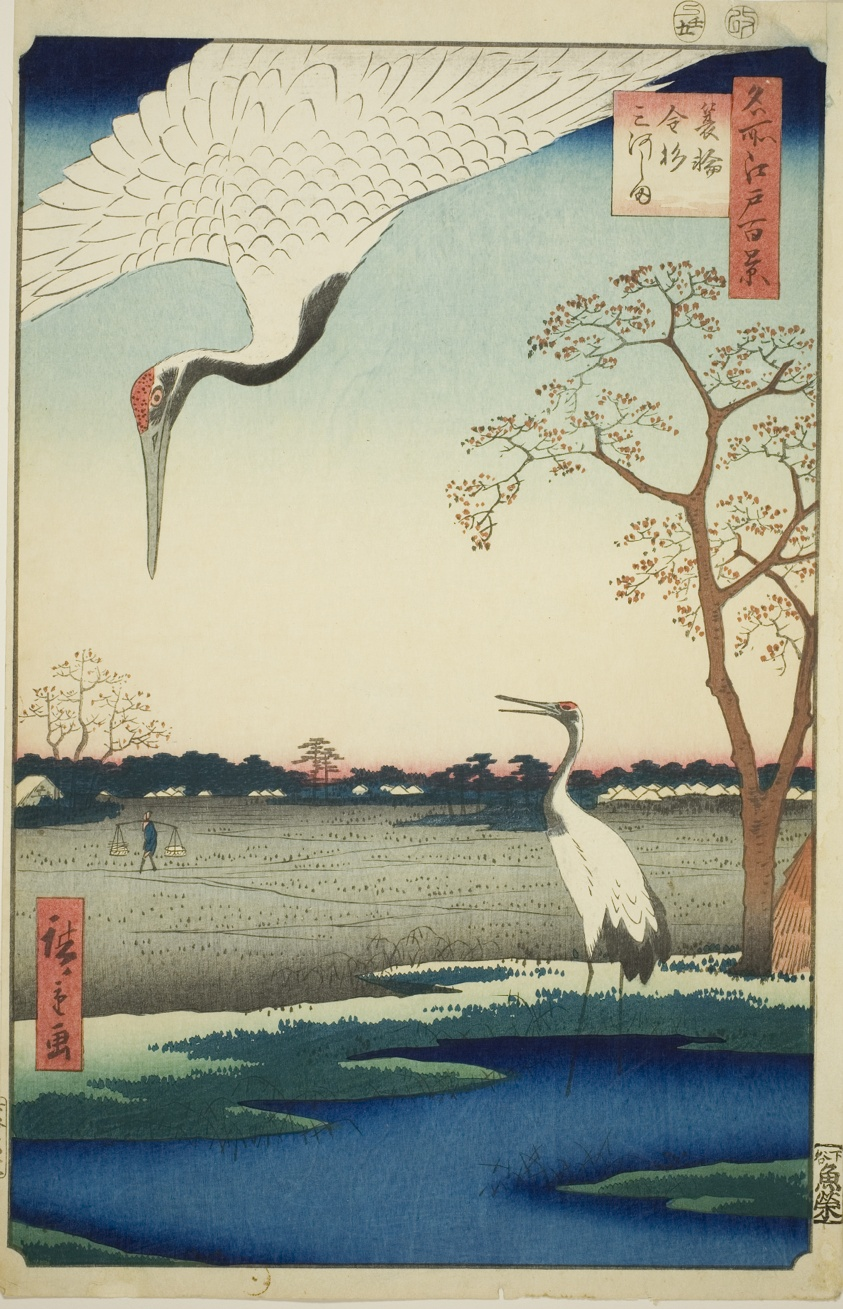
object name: Print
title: Minowa, Kanasugi, Mikawashima, from the series “One Hundred Famous Views of Edo (Meisho Edo hyakkei)”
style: Japanese (culture or style)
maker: Utagawa Hiroshige 歌川 広重; Japanese, 1797-1858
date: 1857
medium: Color woodblock print; oban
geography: Japan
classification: woodblock print; print; asian art